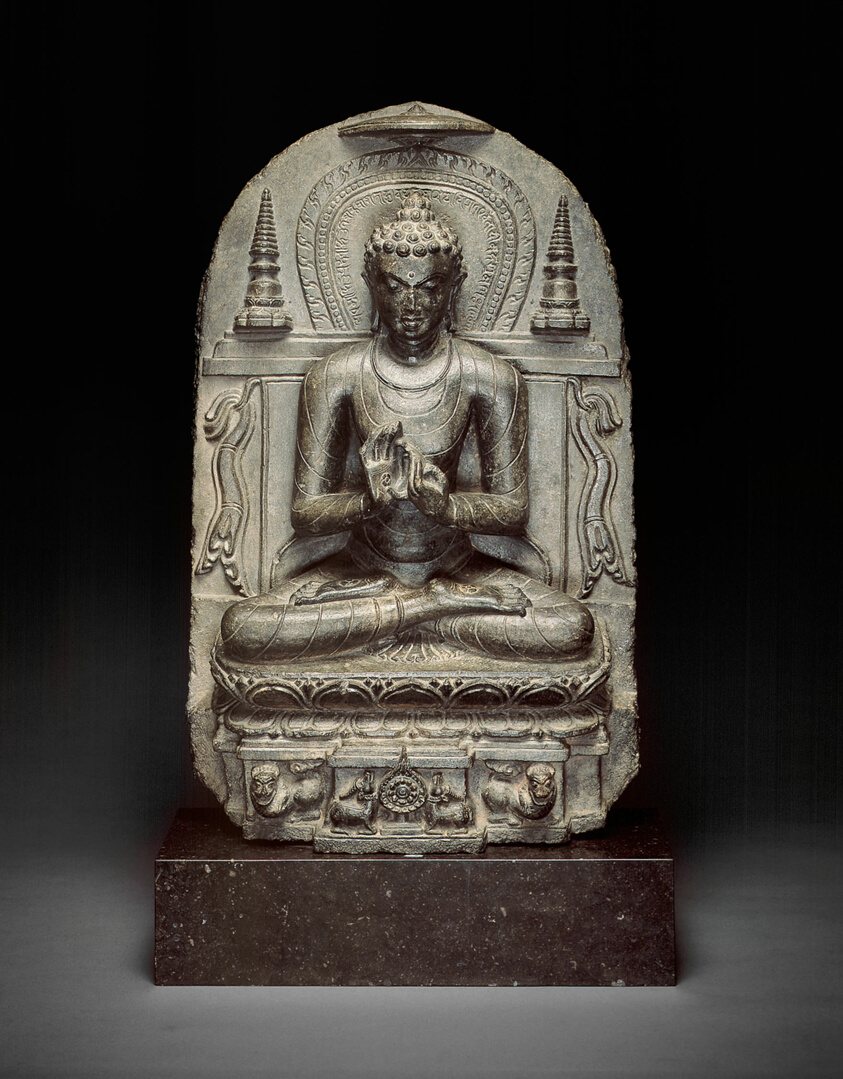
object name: Sculpture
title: Buddha Giving the First Sermon (Dharmachakrapravartanamudra)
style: South Asian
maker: India; Bihar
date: Pala period, late 10th/early 11th century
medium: Black stone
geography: Bihar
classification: stone (unidentified); stone; sculpture; asian art